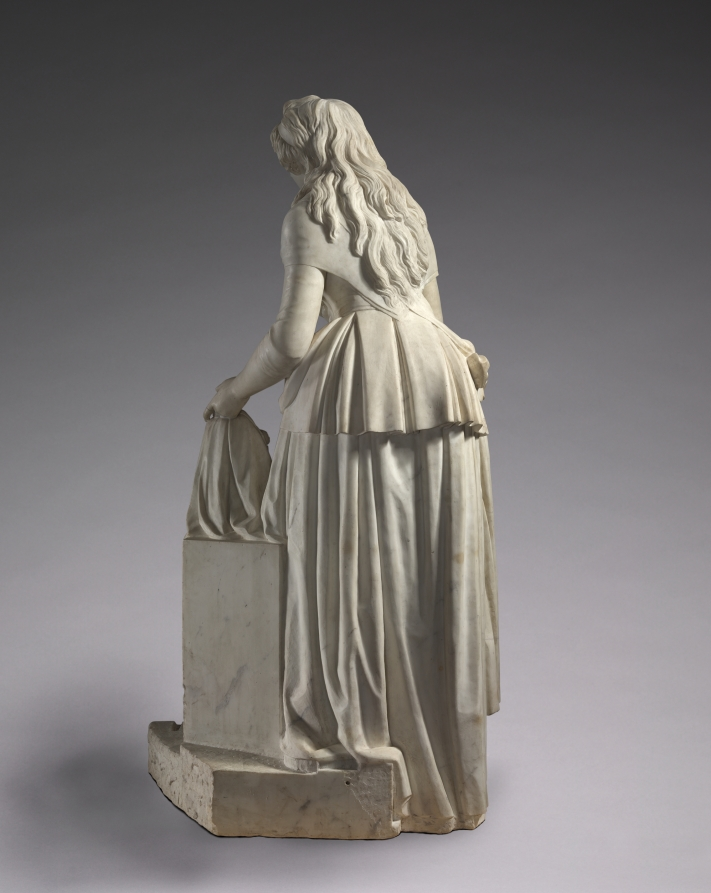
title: Funerary Monument for the Marquis de Tourney (for the Chapel of the Château de la Falaise)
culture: France, Paris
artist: François-Nicolas Delaistre (French, 1746–1832)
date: 1787–1793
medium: marble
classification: Sculpture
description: The Marquis Gallyot de Tourney commissioned this sculpture to serve as his funeral monument. It depicts a young woman gesturing with one hand toward an urn bearing the inscription Voilà ce coeur qui nous a tant aimé (Here is the heart that loved us so). The marquis specified that the figure should be a rosière, a virtuous woman of humble circumstances, a choice likely informed by the writings of Enlightenment philosophers, especially Jean-Jacques Rousseau, who championed greater social equality and democratic reform.